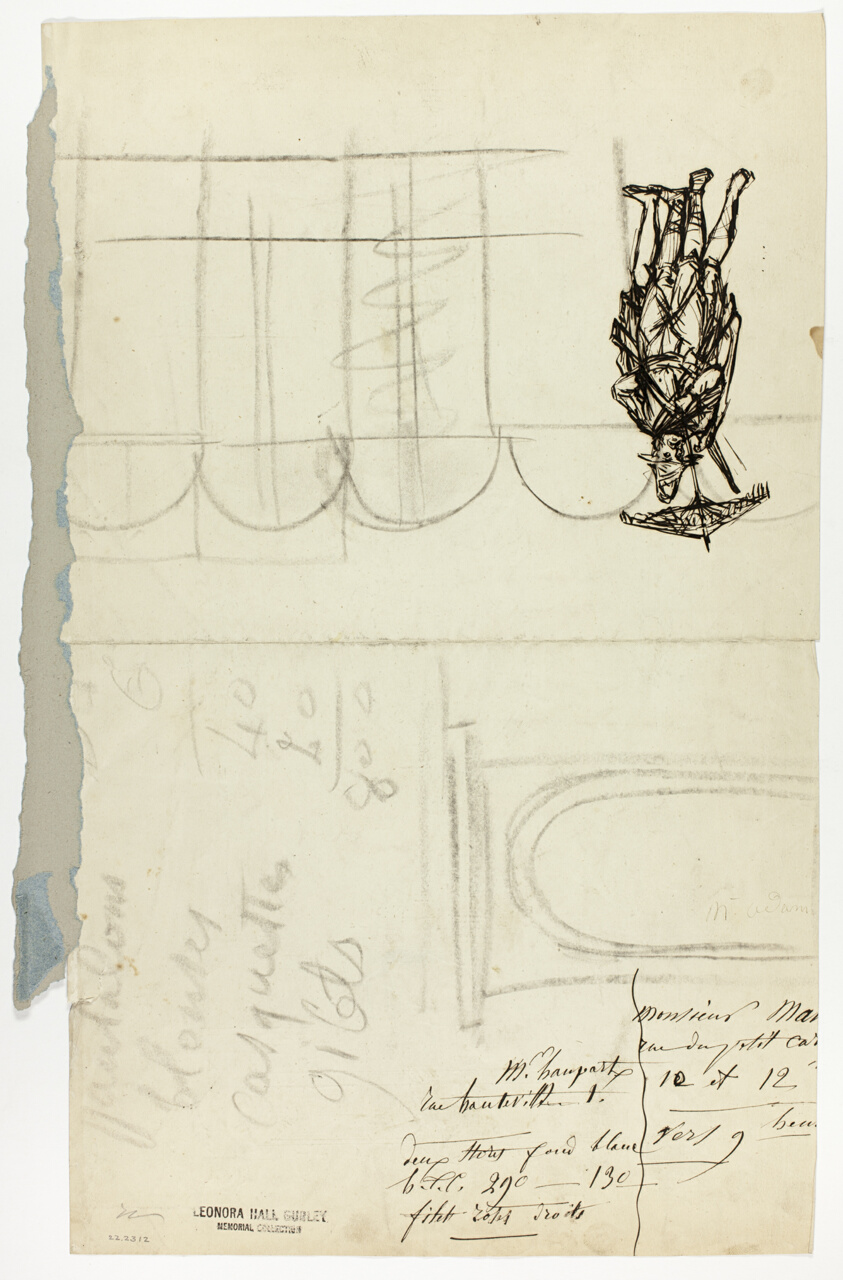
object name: Drawing and Watercolor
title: Monumental Vase in Ornamental Frame (recto); Sketch of Standing Man with Parasol and Parrot, and Architectural Studies (verso)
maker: Unknown Artist; French, 19th century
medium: Pen and brown ink and brush and brown wash, with graphite (recto), and pen and brown ink, with charcoal (verso), on cream wove paper, tipped onto blue wove paper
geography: France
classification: pen and ink drawings; brush and wash; paper; drawings (visual works); prints and drawing